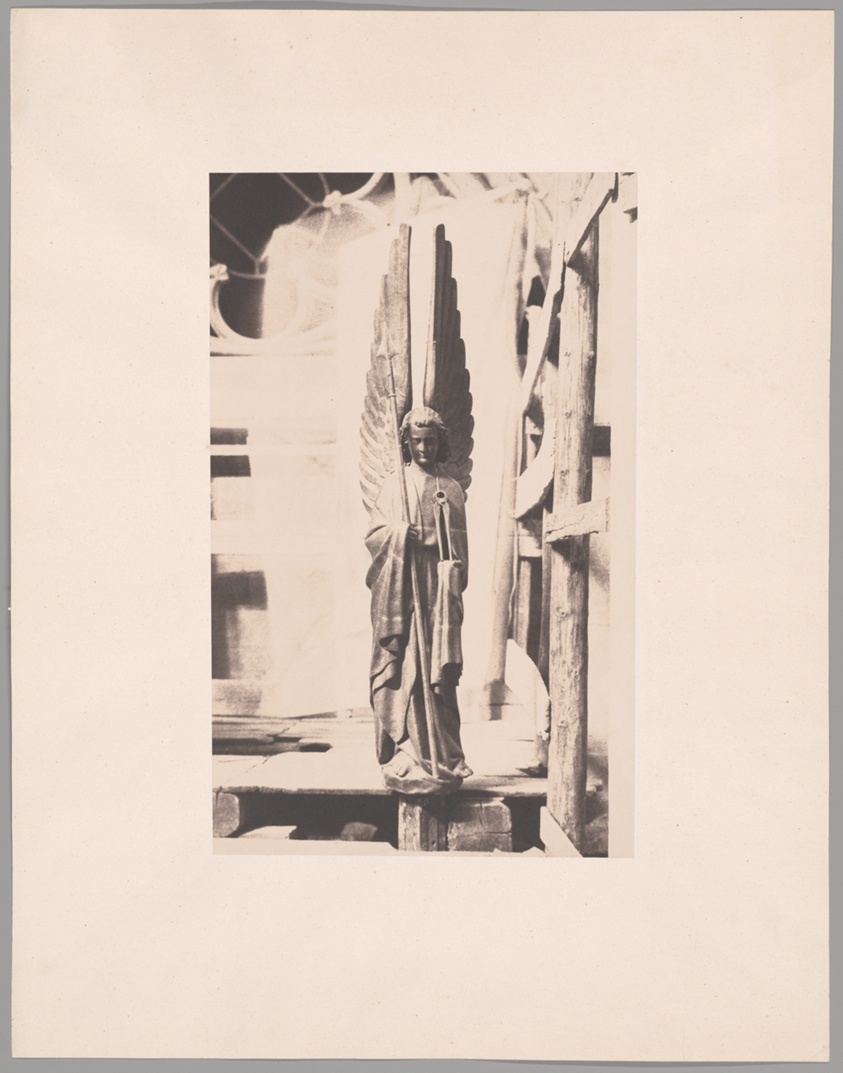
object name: Photograph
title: Angel, Sainte-Chapelle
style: 19th century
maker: Auguste Mestral; French, 1812–1884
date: 1853-54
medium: Salted paper print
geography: France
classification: photography; salted paper print; photographic process; photograph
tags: Paris